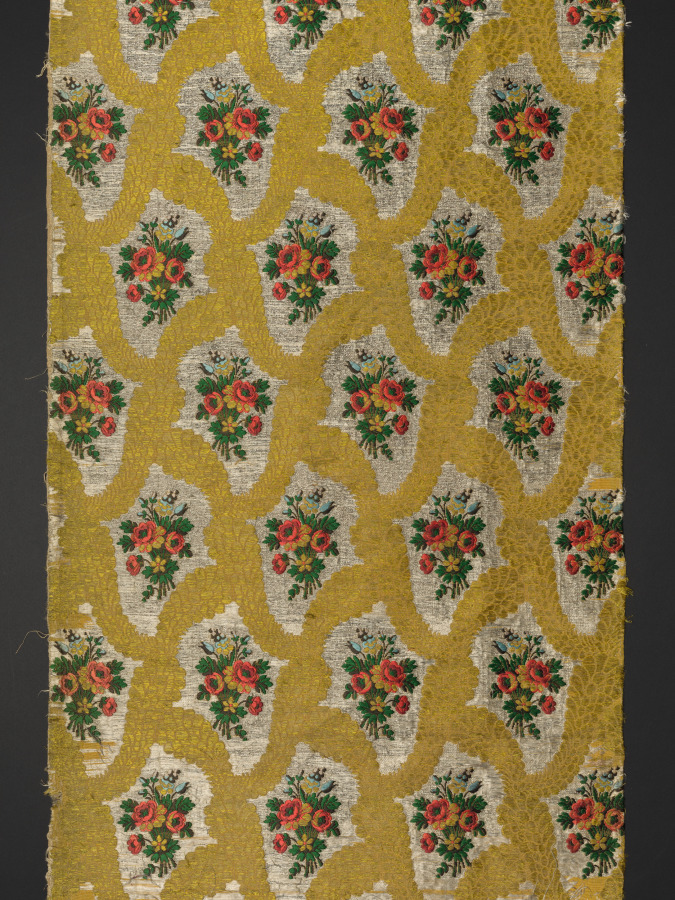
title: Coverlet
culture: Italy, 18th century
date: 1700s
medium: silk, metallic thread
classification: Textile